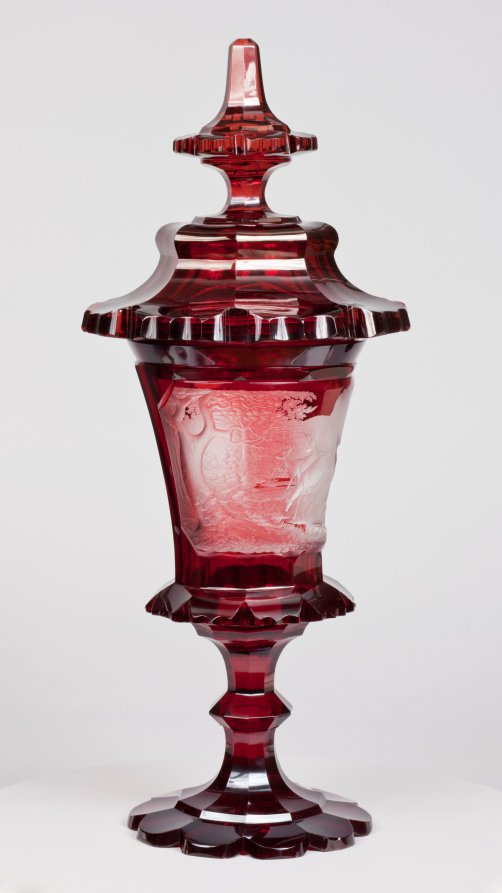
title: Covered Cup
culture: Bohemia, 19th century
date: mid-1800s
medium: ruby glass with engraved decoration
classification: Glass